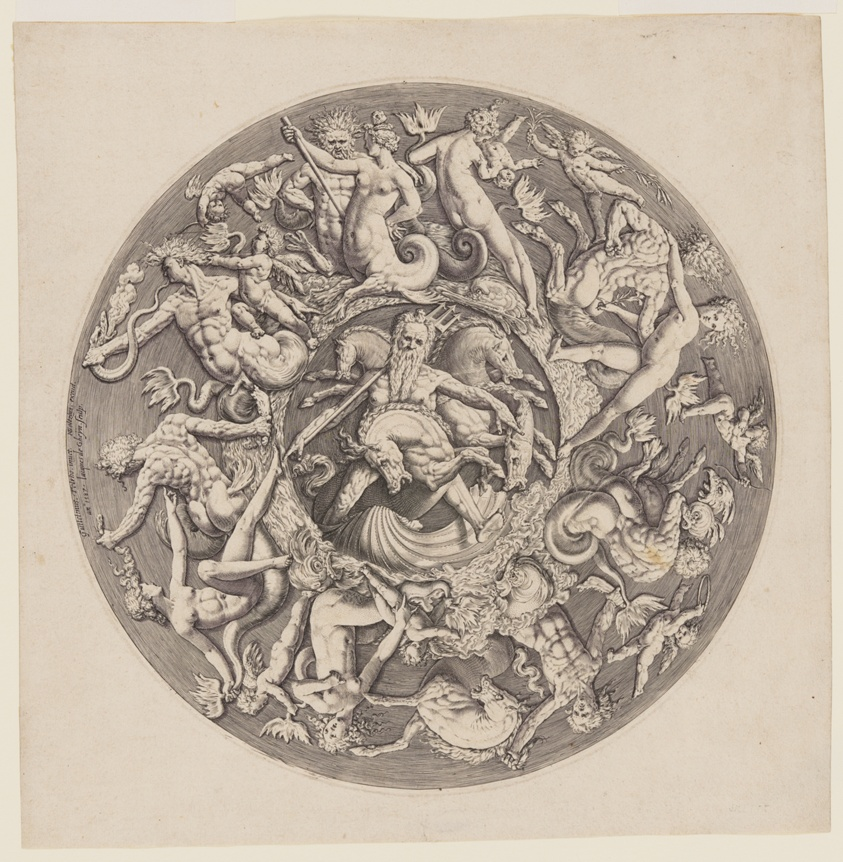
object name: Print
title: Neptune’s Kingdom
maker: Jacques de Gheyn II (Dutch, 1565–1629); after Willem Danielsz. van Tetrode (Dutch, c. 1505/10-1580/88)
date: 1587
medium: Engraving on ivory laid paper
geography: Netherlands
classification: engraving; paper; print; prints and drawing